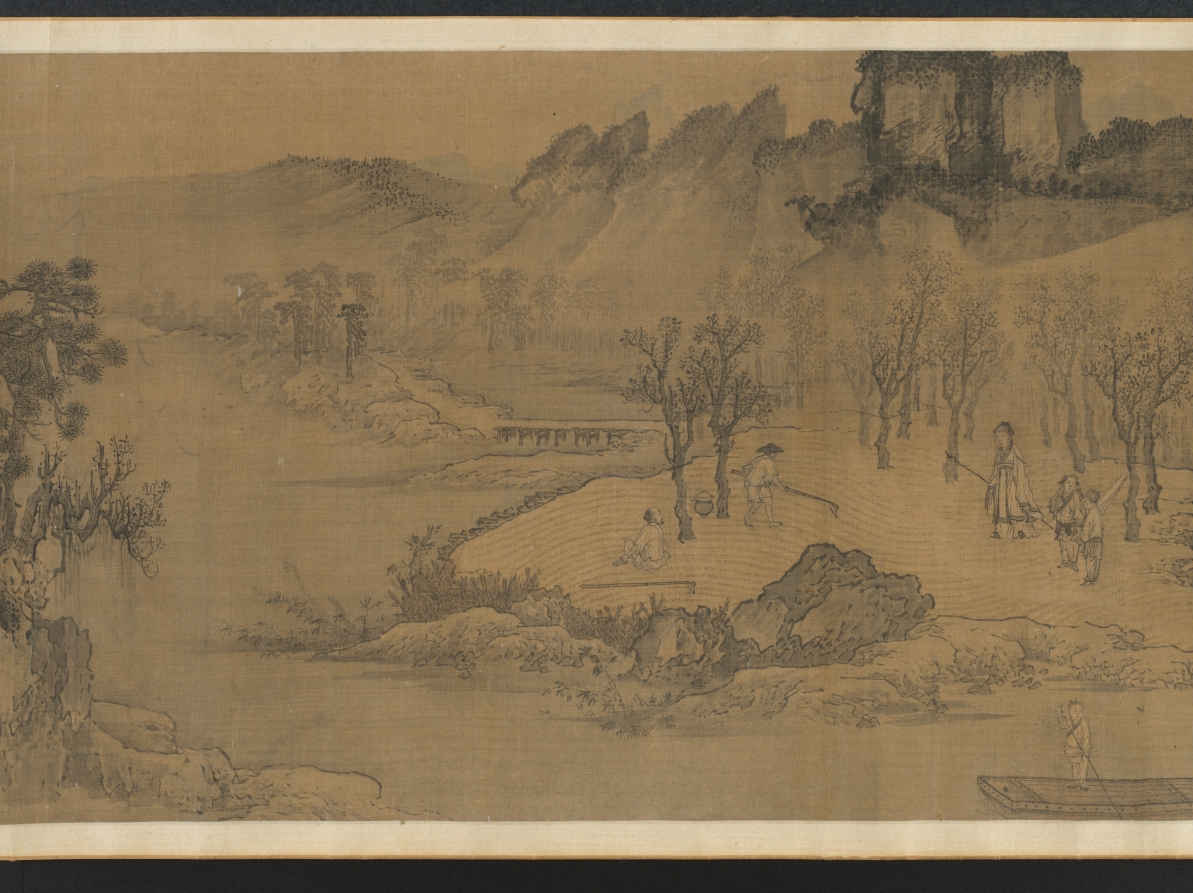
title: Tao Yuanming's Return Home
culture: China, Yuan dynasty (1271-1368)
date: 1300s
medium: Handscroll; ink and slight color on silk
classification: Painting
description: Tao Yuanming's revered poem "Return Home 歸去來辭 (Gui qu lai ci)" powerfully conveys his desire to leave bureaucratic life for the simplicity and authenticity of nature. This sentiment has deeply resonated with generations of Chinese scholars, making it a popular theme in paintings. This handscroll uses continuous narrative depicting Tao in multiple scenes from the poem. Starting on the right, the poet travels to his home. His children wait by the gate, while his wife pauses to tidy her hair before welcoming him. Then, free from the burdens of official service, Tao spends time in both nature and his cottage, where he can again enjoy wine, music, and books.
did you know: Poet Tao Yuanming 陶淵明 (c. 365–427 CE) returned to a secluded life instead of pursuing a civil service career.